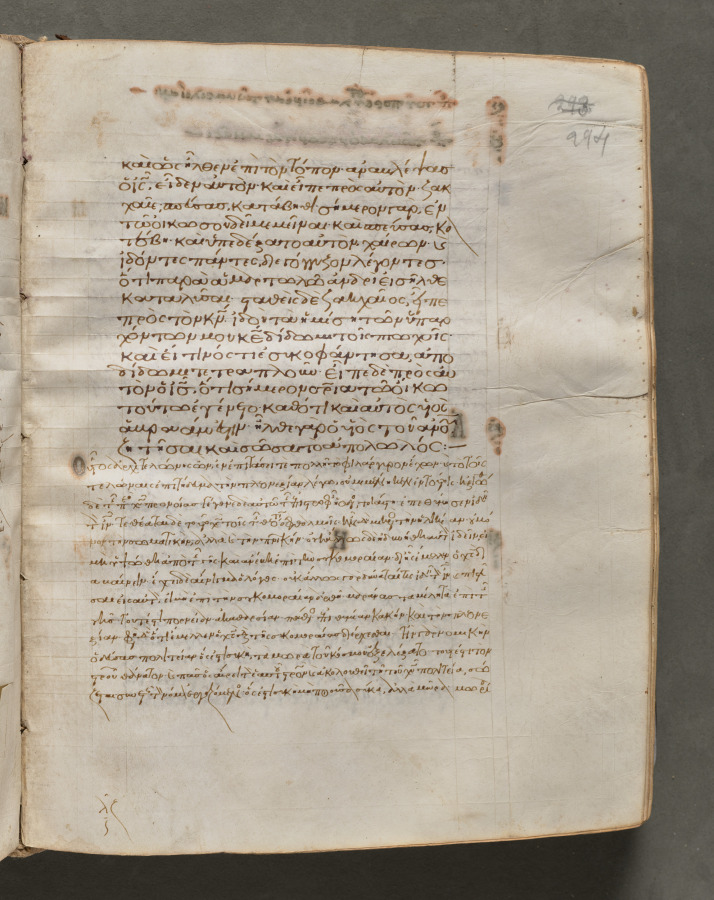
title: Text, folio 294 (recto), from a Gospel Book with Commentaries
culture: Byzantium, Constantinople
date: c. 1000–1100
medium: ink, tempera, and gold on vellum; leather binding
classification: Bound Volume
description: Each of the four gospels in this book opens on a page with brilliantly illuminated borders depicting the author of the text as well as birds—principally peacocks, symbols of the immortality of the soul—and fountains, representing the fountain of life and the salvation of the soul. This volume consists of 428 leaves with texts in Greek. Its level of sophistication suggests that it was probably written and decorated in a monastery in Constantinople.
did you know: Gospel books were carried in procession through Byzantine churches.